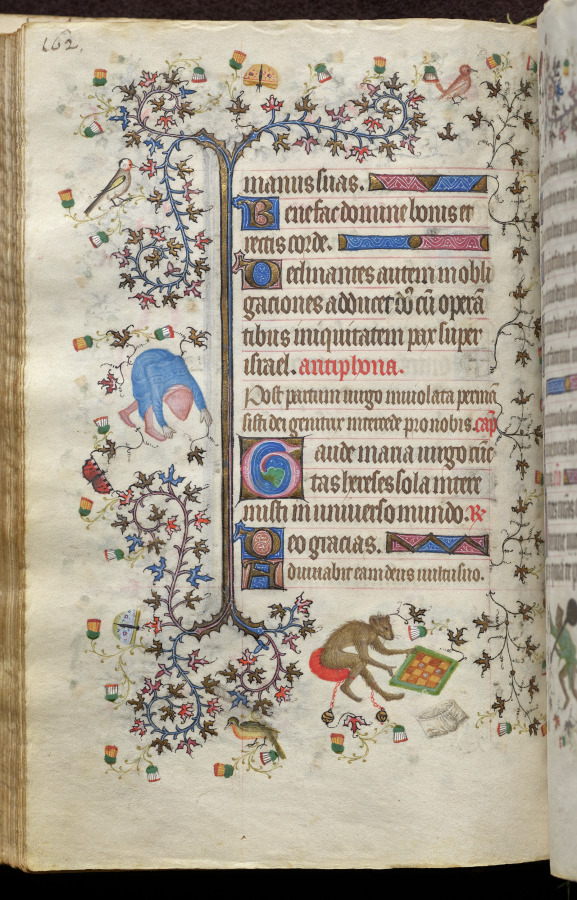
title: Hours of Charles the Noble, King of Navarre (1361-1425): fol. 81v, Text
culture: France, Paris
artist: Master of the Brussels Initials and Associates (French)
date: c. 1405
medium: ink, tempera, and gold on vellum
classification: Bound Volume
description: This precious volume was obviously highly prized by its owner, the French-born King of Navarre, who had his coat of arms painted on no less than twenty folios. Rather than directly commissioning this manuscript from a specific workshop, it seems that Charles the Noble acquired his book of hours -- perhaps ready-made for the luxury market -- while on a trip to Paris in 1404-05. A collaborative effort, six painting styles are evidenced within the pages of this codex, those of two Italians, two Frenchmen, and two Netherlanders. The painter who was responsible for the planning and decoration of the book, and who produced seventeen of the large miniatures, was a Bolognese artist known as the Master of the Brussels Initials. His principal assistant, responsible for most of the borders, was a Florentine who signed his name "Zecho" da Firenze on folio 208 verso.